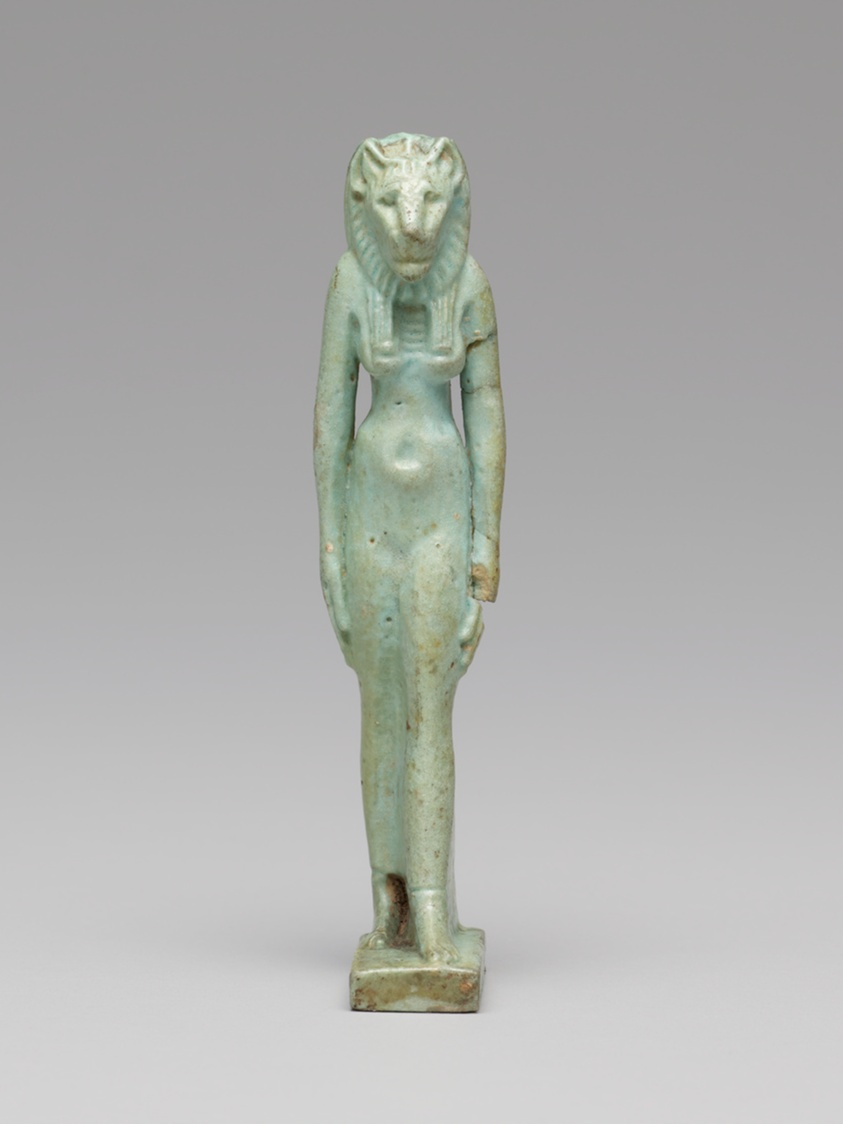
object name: Costume and Accessories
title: Amulet of Sekhmet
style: third intermediate period, egyptian, ancient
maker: Egyptian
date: Third Intermediate Period (about 1069–664 BCE)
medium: Faience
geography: Egypt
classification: amulet; jewelry; ceramics; ancient art; costume; faïence (composite material)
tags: goddesses, animals, lions, cats